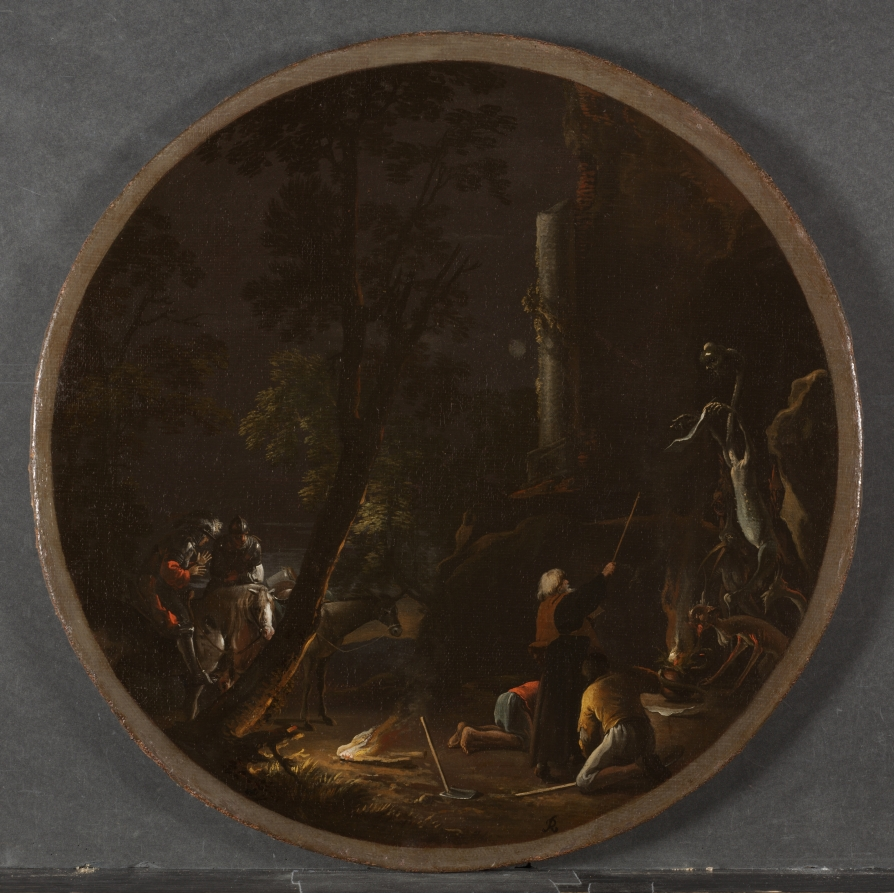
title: Scenes of Witchcraft: Night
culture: Italy, 17th century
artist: Salvator Rosa (Italian, 1615–1673)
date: c. 1645–1649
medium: oil on canvas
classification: Painting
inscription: Signed: "SR [monogram]"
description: In the pitch black of night, two groups of men are gathered in a forest. To the left, travelers apprehensively pause to watch a magician conjure terrifying apparitions. Since the Middle Ages, necromancy, the act of communing with the dead, was associated with male sorcerers. In Rosa's painting, the wizened necromancer who stands tall and resolute directly below a classical column is reminiscent of Moses, a predecessor to Renaissance depictions of sorcerers. Rosa's learned magicians not only invoke associations with philosophers and intellects, but they would have also referred to the artist himself and the intellectual elite with whom he associated in Florence. Just as a powerful magician could conjure strange creatures with his wand, so too could Rosa shape a strange world with his originality, intelligence, and the skillful use of paint and brush.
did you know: The artist chose the painting's shape to reference the foundational role of the circle in practicing magic.